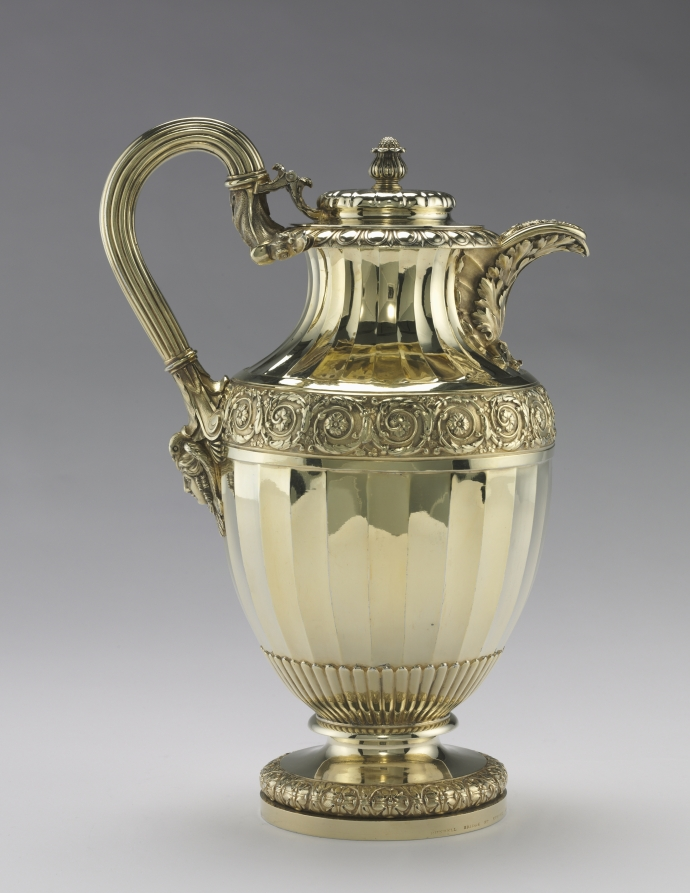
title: Wine Ewer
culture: England, London, 19th century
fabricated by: Paul Storr (British, 1771–1844)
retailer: Rundell, Bridge and Rundell (British, 1797–1834)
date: 1815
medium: silver gilt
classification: Silver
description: Silver was firmly established as a symbol of wealth, status, and power by the 1800s. Throughout history, styles largely followed the taste of the reigning monarch and thus reflected the political and social alliances that underpinned the aristocracy in Britain. The frieze of scrolls surrounding the handle, the acanthus leaf supporting the lip, and the dolphin heads framing the hinge on this ewer are characteristic of a bolder expression of classical taste favored during the Regency period (1811–20).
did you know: The vine-leaf border along the top of this ewer was inspired by Roman silver from antiquity and popularized by Paul Storr in the 1800s.